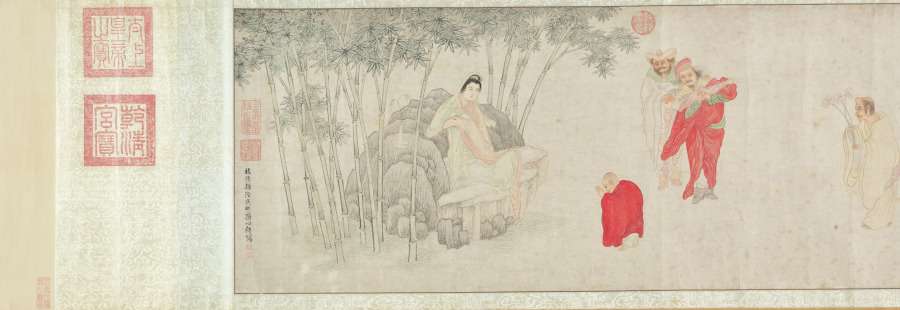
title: The Five Hundred Arhats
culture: China, Ming dynasty (1368–1644)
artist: Wu Bin (Chinese, active c. 1591–1626)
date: 1591–1626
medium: Handscroll; ink and color on paper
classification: Painting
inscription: 枝隱頭陀吳彬齋心拜寫 [印]吳彬之印; 文中父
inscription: 7 seals of Qianlong emperor (r. 1736–95): Gu xi tian zi 古希天子; Shou 壽; Qianlong jian shang 乾隆鑑賞; San xi tang jing jian xi 三希堂精鑑璽; Yi zi sun 宜子孫; Tai shang huang di zhi bao 太上皇帝之寳; Qian qing gong bao 乾清宮寶.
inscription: 6 seals of Cheng Qi 程琦 (1911–1988): Ke an geng zi wu shi yi hou suo de ming ji 可菴庚子五十以後所得名跡; 5 other Cheng Qi seals.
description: More than 66 feet long, this handscroll depicts 447 luohans, 72 attendants, and the bodhisattva of compassion at its very end. Luohans (arhats in Sanskrit), disciples of the Buddha and protectors of the Buddha’s law, possess supernatural powers and take on myriad external appearances. The amusing assortment of characters are engaged in an array of religious, secular, and miraculous activities. The painter used stylistic features borrowed from earlier artists, carefully controlled lines, and refined coloring. Wu Bin was a lay Buddhist and depicting this sort of image was part of a religious practice seeking understanding of the Buddha’s teaching.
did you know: Far advanced on the path to enlightenment, arhats have the capacity to tame tigers, free dragons, and to float on water or in the air.